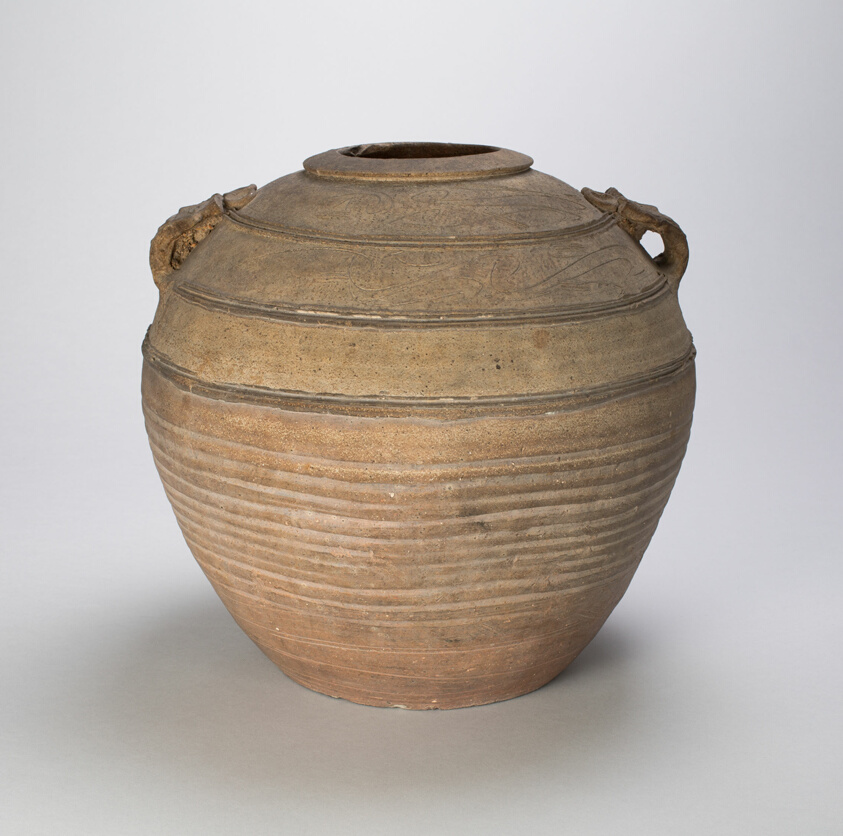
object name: Vessel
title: Jar (Hu) with Two Loop Handles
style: Chinese (culture or style)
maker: China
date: Western Han dynasty (206 B.C.–A.D. 9), 1st century B.C.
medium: Stoneware with underglaze incised decoration and ash glaze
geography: China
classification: stoneware; asian art; ceramics; vessel